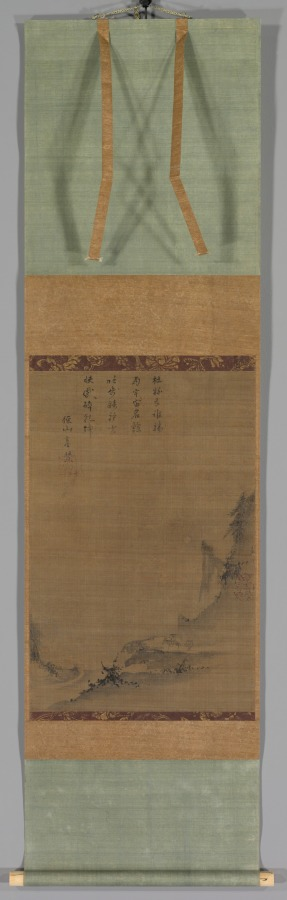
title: Mountain Landscape in Moonlight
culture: China, Southern Song dynasty (1127–1279) to Yuan dynasty (1271–1368)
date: 1200s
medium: hanging scroll; ink on silk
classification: Painting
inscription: 2 unidentified seals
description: Painted in modulated monochrome ink washes with dark dots for foliate accents, the anonymous artist successfully suggests the dense atmosphere of a warm summer night. Under a full moon a scholar rides a mule, accompanied by a servant who carries his belongings. The poem inscribed by Chan (Zen) priest Yunfeng Miaogao identifies the figure as the Tang dynasty poet Du Fu 杜甫 (712–770). Who rides Du [Fu]'s mule: Through the universe his name resounds. Chanting poems as he rides off on his mule, How quickly does he become drunk with Heaven and Earth!